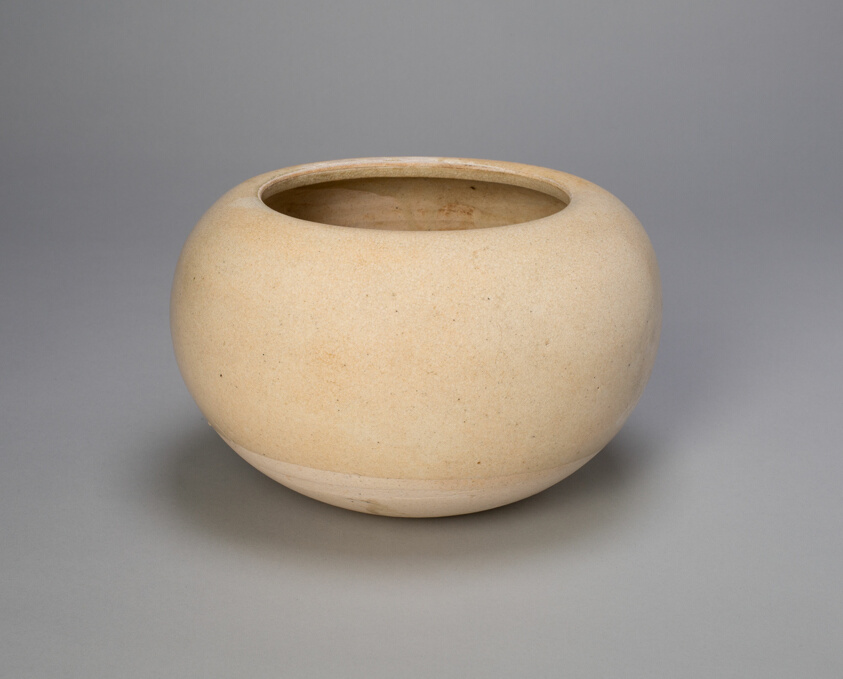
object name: Vessel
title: Globular Bowl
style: Chinese (culture or style)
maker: China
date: Sui (581–618) or Tang dynasty (618–907), early 7th century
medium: Glazed stoneware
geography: China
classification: bowl; stoneware; dish (vessel); asian art; ceramics; vessel